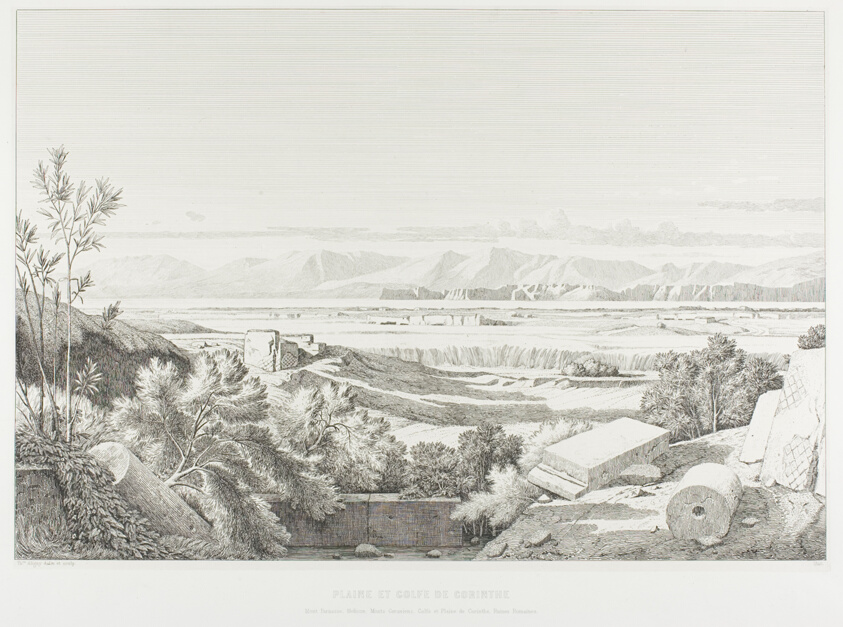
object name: Print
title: View of Délos: Cyclades. Port of Délos, Paros and Greater Délos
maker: Théodore Caruelle d'Aligny; French, 1798-1871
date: 1845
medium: Etching on ivory China paper, laid down on white wove paper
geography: France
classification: etching; print; prints and drawing